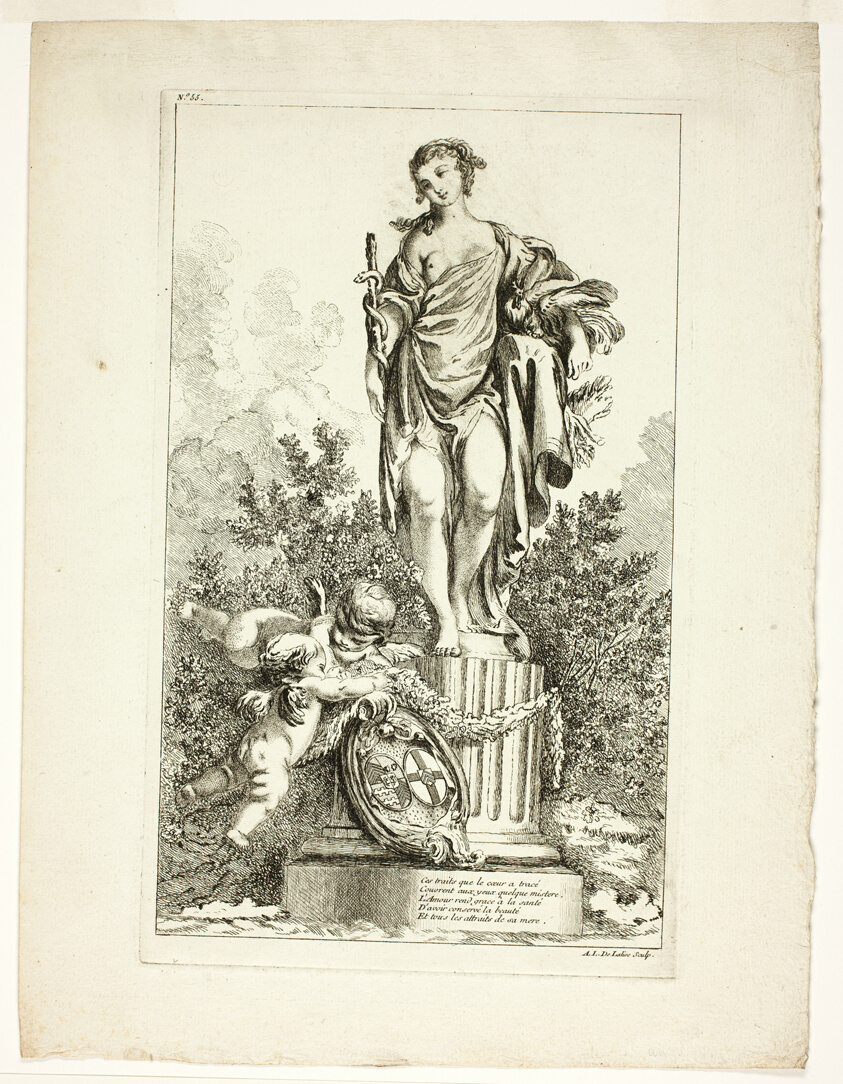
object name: Print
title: Two Lovers Giving Thanks to the Statue of Health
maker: Ange Laurent de La Live de Jully (French, 1725-1779); after François Boucher (French, 1703-1770)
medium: Etching in black on ivory laid paper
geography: France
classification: etching; paper; print; prints and drawing